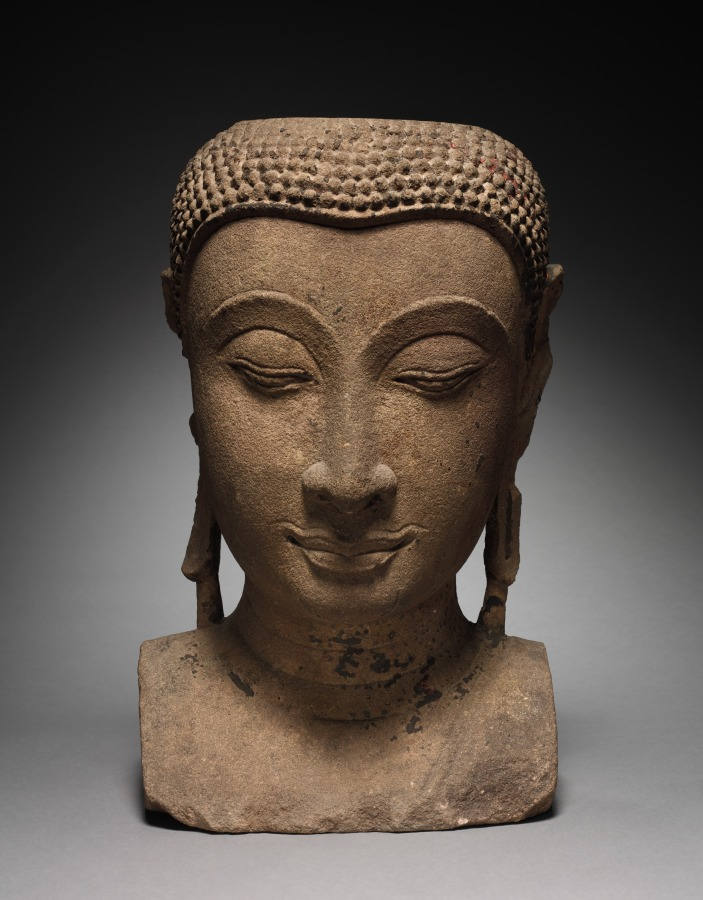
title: Head of Buddha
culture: Thailand, Ayutthaya, 14th-15th century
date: 1350–1425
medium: sandstone and lacquer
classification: Sculpture